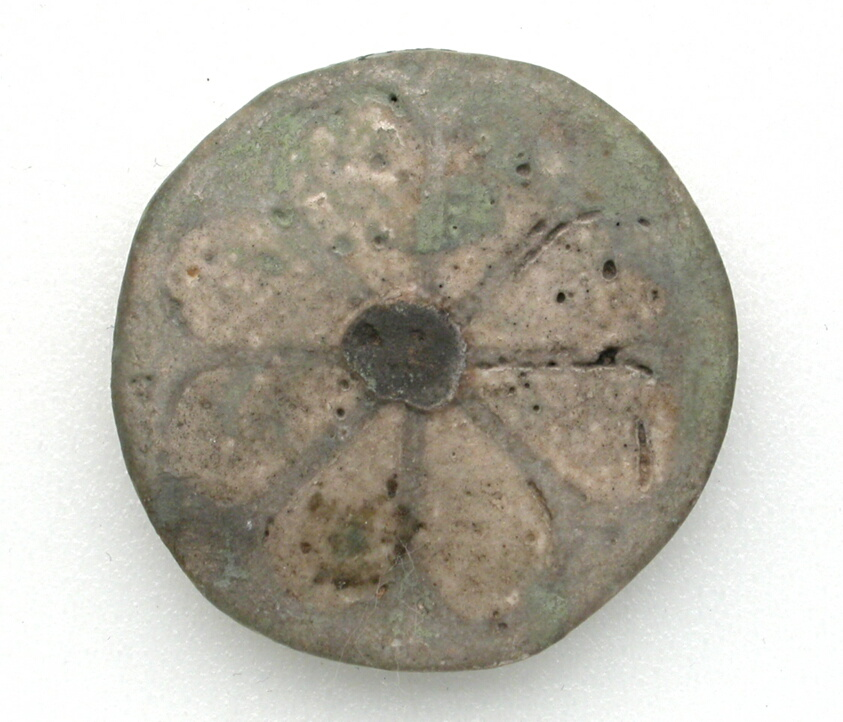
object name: Decorative Arts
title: Rosette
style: new kingdom, egyptian, ancient, ramesside period, twentieth dynasty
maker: Egyptian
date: New Kingdom, Dynasty 20 (about 1186–1069 BCE)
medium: Faience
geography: Egypt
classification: inlay; ceramics; ancient art; decorative arts; faïence (composite material)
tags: flowers